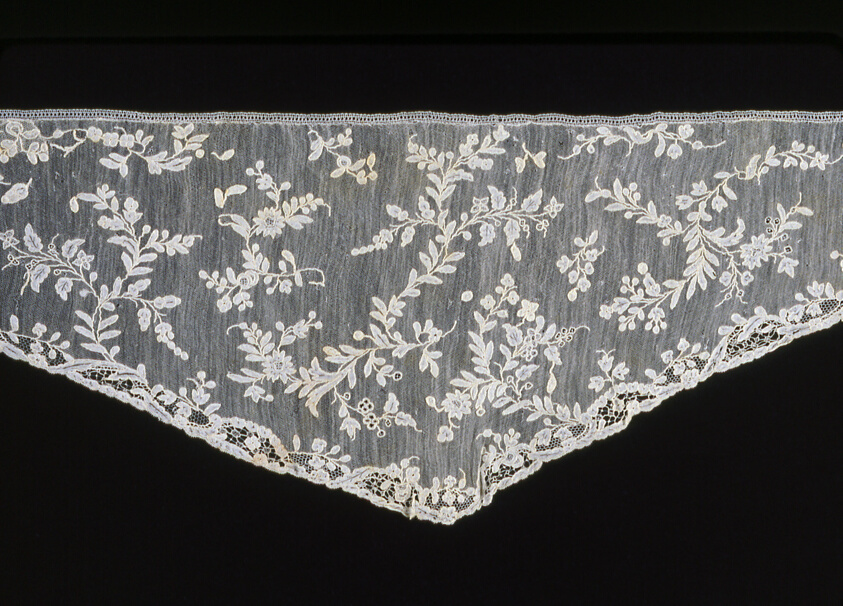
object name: Costume and Accessories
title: Shaped Sleeve Ruffle (Engageanté)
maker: Italy, Burano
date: 1770s/80s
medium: Linen, needle lace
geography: Burano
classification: costume accessory; lace - needle; textile; costume